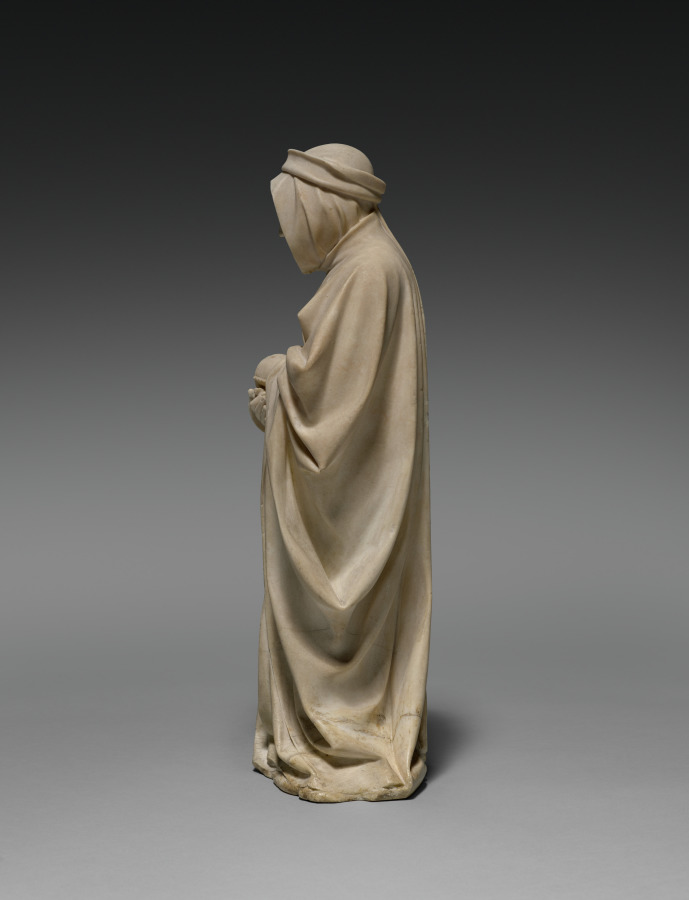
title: Mourner from the Tomb of Philip the Bold, Duke of Burgundy (1364–1404)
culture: Netherlands, active Dijon, 15th century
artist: Claus de Werve (Netherlandish, 1380–1439)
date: 1404–1410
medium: vizille alabaster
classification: Sculpture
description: This figure comes from the tomb of Duke Philip the Bold from the church of Champmol near Dijon (Burgundy, France). Philip, who founded the monastery and designated it as his burial place, hired the best artists, many of whom came from the Netherlands. While the commission was given in 1381, the work was not completed until 1410, six years after the duke’s death. This mourner is unusual for the time because it is not carved as a static low relief on the pedestal of the tomb but interacts with the viewers and their fellow procession members. The lifelike quality of the figure is due in large part to the alabaster. Its softness allowed artists to carve details into the material, and the transparent, milky white stone could also be polished to a high gloss.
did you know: During his life, Duke Philip founded the monastery of Chartreuse de Champmol to serve as a final resting place for himself and his family.